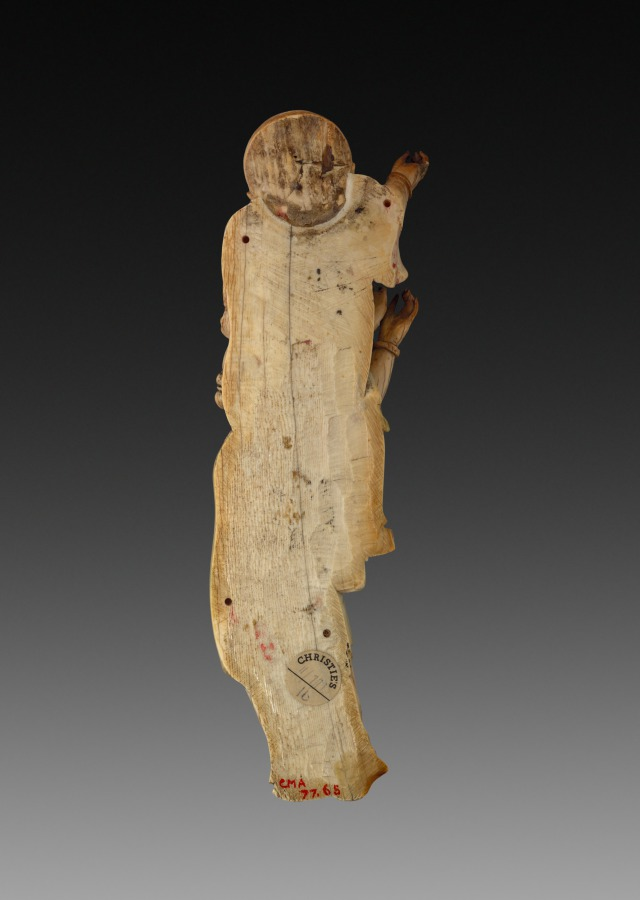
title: Wall Plaque with Two Boys Playing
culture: China, Qing dynasty (1644-1911)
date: 1700s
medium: ivory with traces of polychrome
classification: Ivory